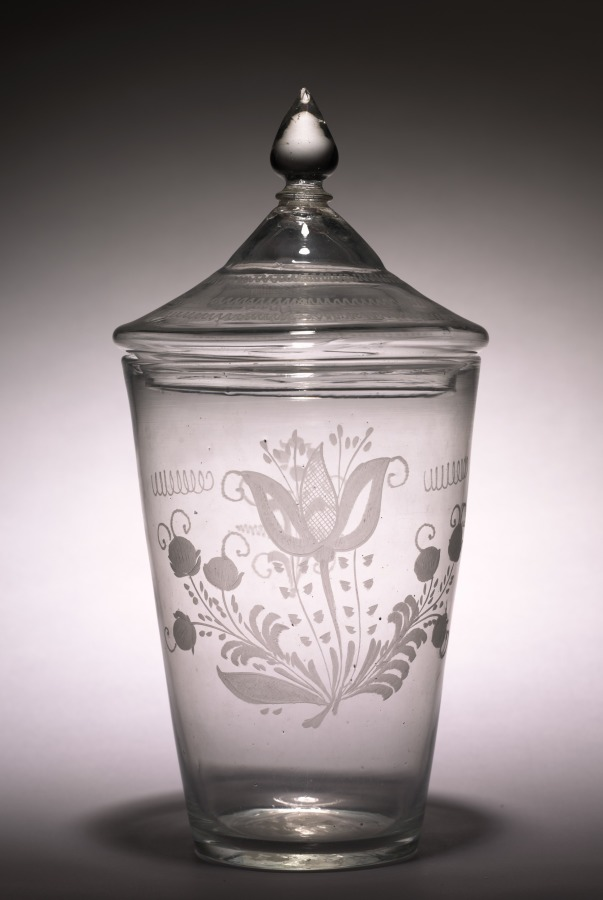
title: Flip Glass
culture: America, late 18th century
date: late 1700s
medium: glass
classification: Glass